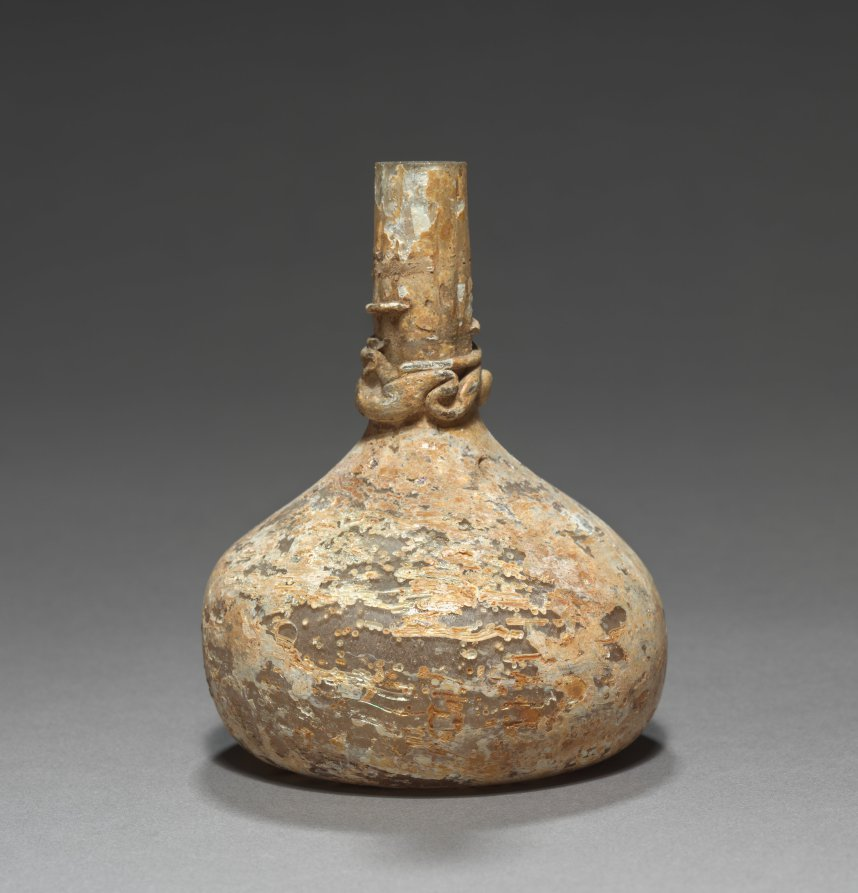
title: Flask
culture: Islamic, probably from Syria/Palestine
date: 800s–900s or later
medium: glass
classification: Glass